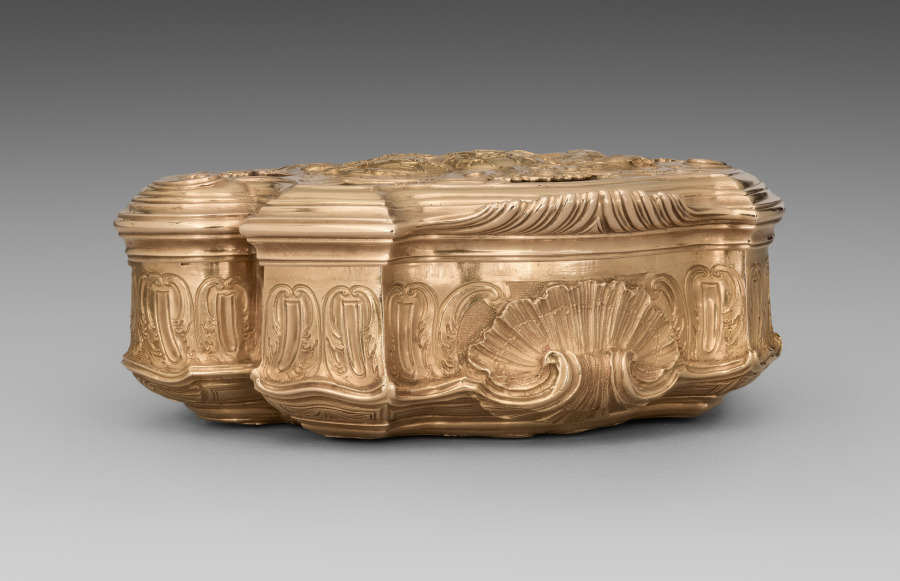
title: Gold Box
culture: France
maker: Juste-Aurèle Meissonnier (French, 1695–1750)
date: 1728–29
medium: gold and lapis lazuli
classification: Metalwork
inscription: IOM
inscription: a crowned M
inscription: a crowned dolphin's head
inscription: a crowned chancellor's mace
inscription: double frame eagle's head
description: With its central cartouche, heavy molding, and fluted sides, the design of this box attests to Juste-Aurèle Meissonnier’s interest in architecture. The box is further distinguished by a strong sense of movement, achieved through its dynamic contour, extraordinary level of detail, and the dramatic contrast between gold and lapis lazuli. Such small boxes, known as snuffboxes, were used to hold scented powdered tobacco that was inhaled through the nostrils. Made of precious materials and highly ornamented, they conveyed the owner’s wealth, fashion awareness, sophistication, and social standing. These personal, collectible items were often presented as luxurious gifts. This box was made for the dowager Queen of Spain, Maria Anna of Neuburg, whose coat of arms – along with that of her late husband, Charles II – features on the cover.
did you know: This is one of the two known objects that bear the maker's mark of Meissonnier.